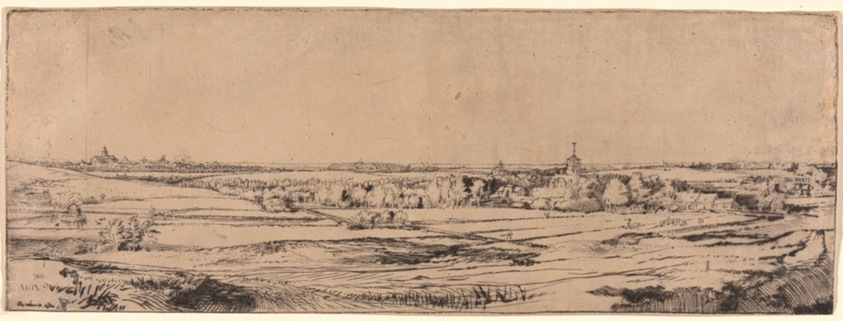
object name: Print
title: Panorama Near Bloemendaal Showing the Saxenburg Estate (The Goldweigher's Field)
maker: Rembrandt van Rijn (Dutch, 1606-1669)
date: 1651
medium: Etching and drypoint in black on cream Japanese paper (discolored to tan)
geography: Holland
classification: etching; print; prints and drawing; paper; drypoint